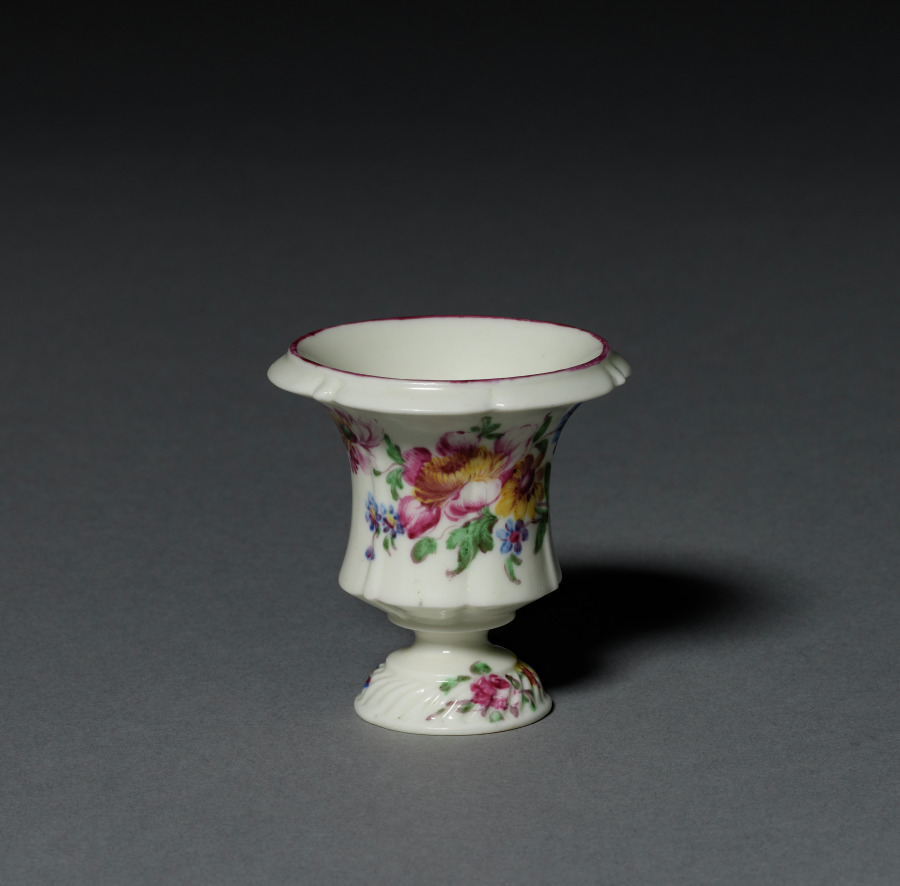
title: Small Urn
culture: France, Mennecy, 18th century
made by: Mennecy Factory (French)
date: c. 1750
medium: soft-paste porcelain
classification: Ceramic